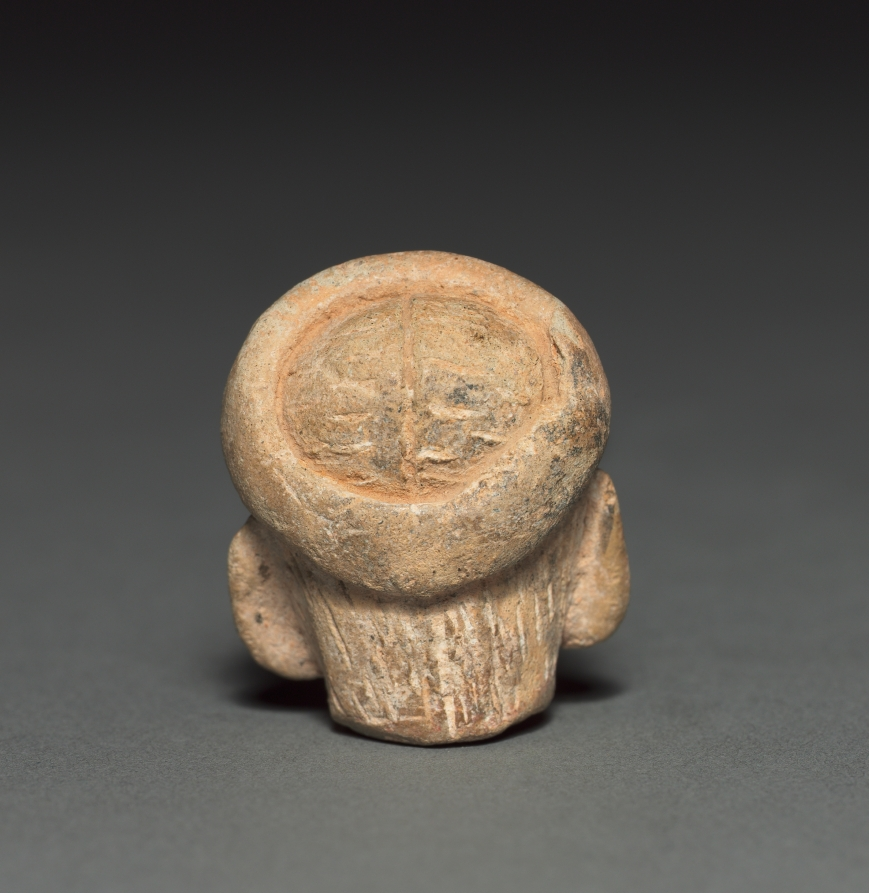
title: Figurine Head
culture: Mexico, Guerrero, Xochipala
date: 1500–1000 BCE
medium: pottery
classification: Sculpture